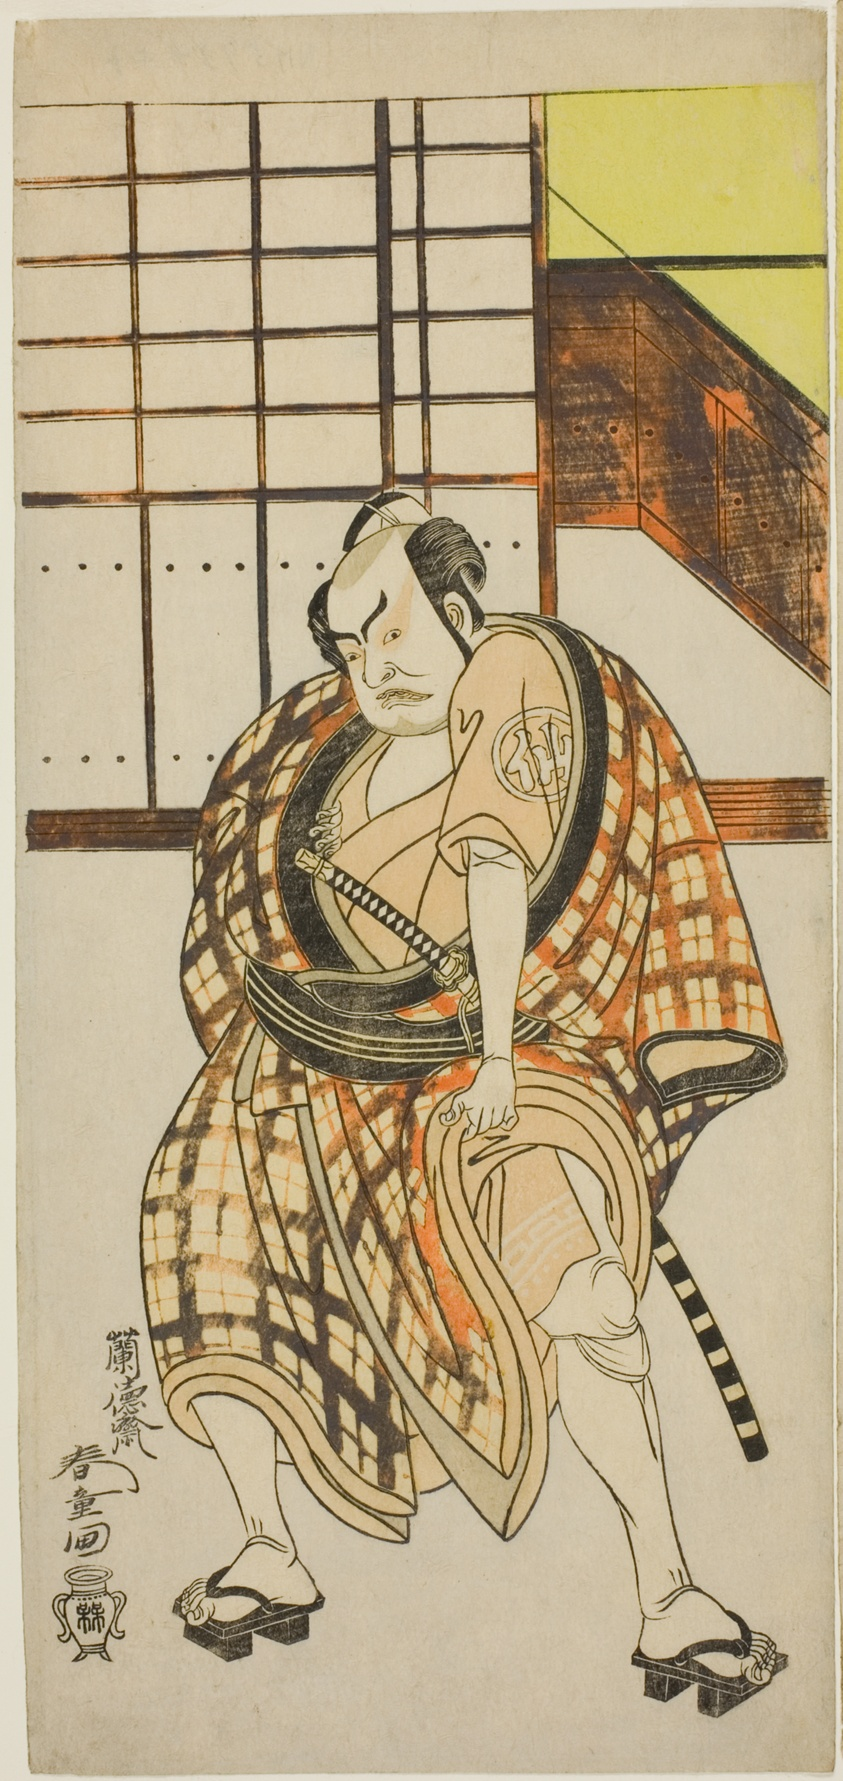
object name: Print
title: Actors Nakamura Sukegorô II as Sasano Sangobei (Left) and Ôtani Hiroji III as Satsuma Gengobei (Right) in “Green Willow Soga of Erotic Design” (“Iro moyô aoyagi Soga”)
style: Japanese (culture or style)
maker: Rantokusai Shundô (Japanese, active about 1770–90)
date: About 1775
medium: Color woodblock prints; hosoban diptych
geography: Japan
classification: woodblock print; print; asian art